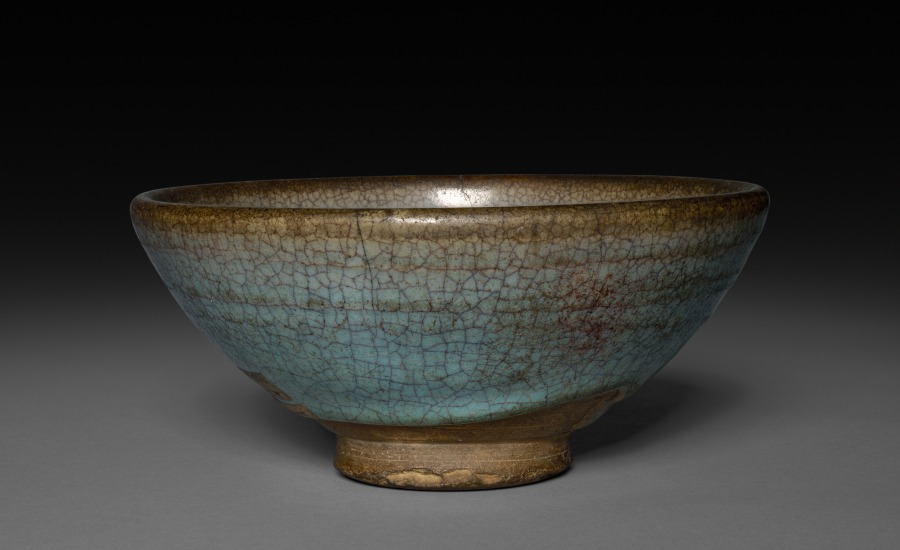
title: Bowl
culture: China, Yuan dynasty (1271-1368)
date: 1271–1368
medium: earthenware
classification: Ceramic